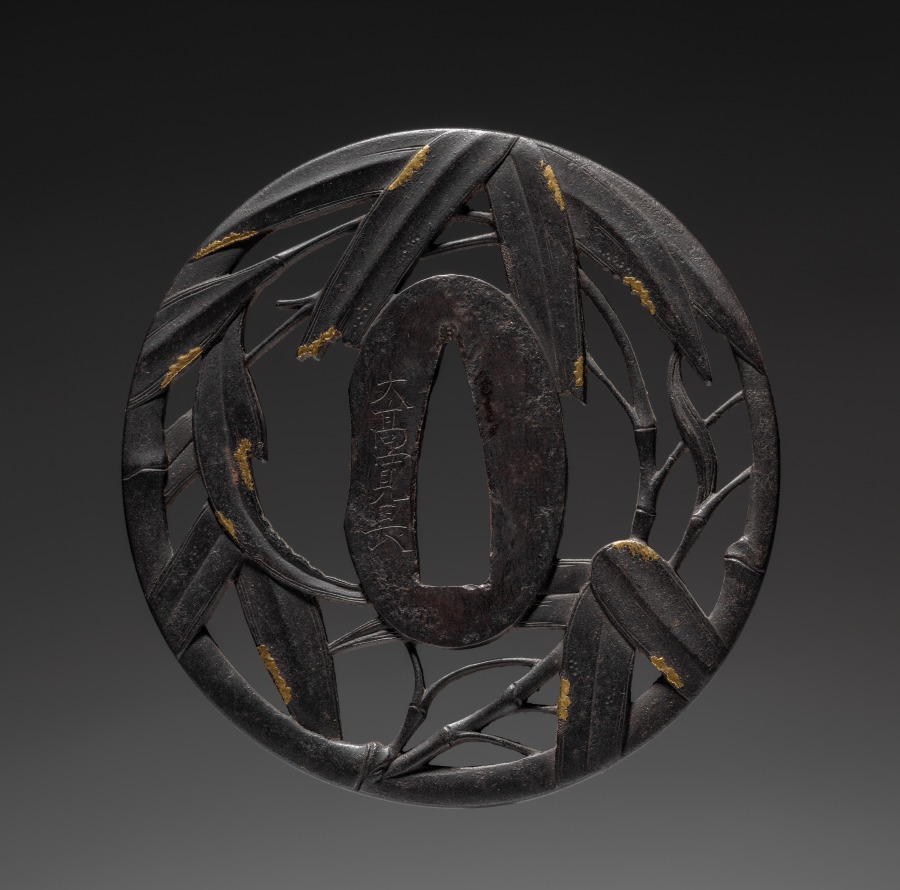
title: Sword Guard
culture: Japan, Edo period (1615–1868)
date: early 1800s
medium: iron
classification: Arms and Armor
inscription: Signature: Otaka Hironaga